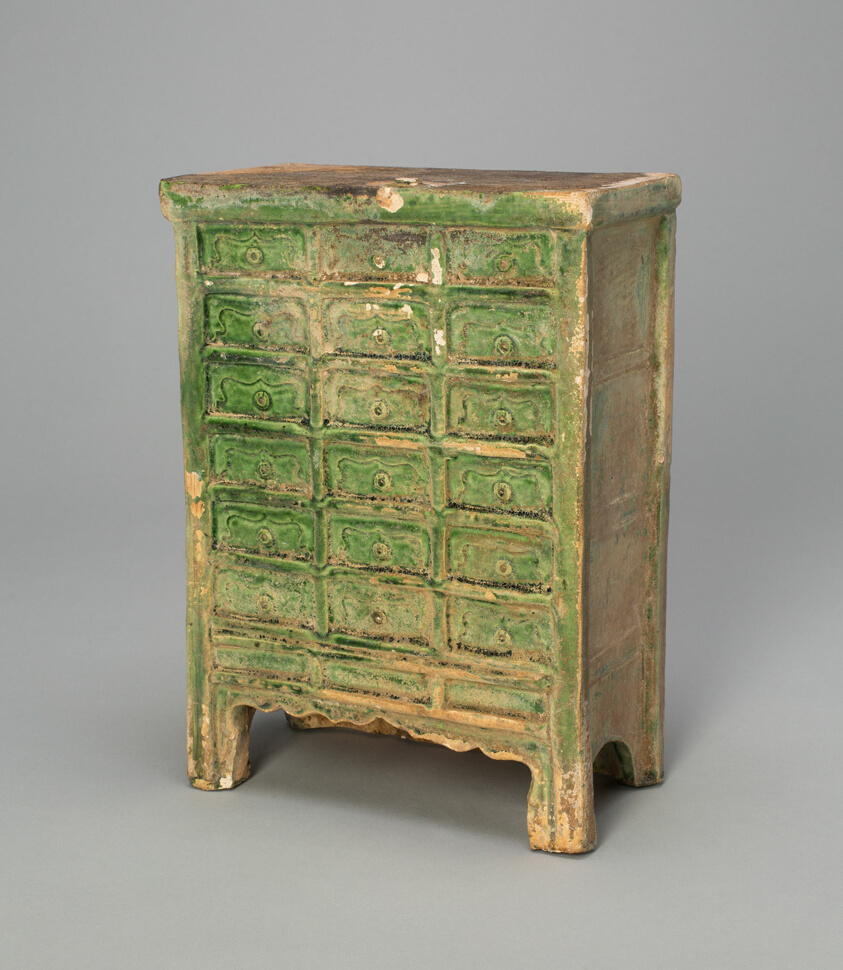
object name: Sculpture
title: Miniature Chest with Drawers (Mingqi)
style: Chinese (culture or style)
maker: China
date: Ming dynasty (1368–1644)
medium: Earthenware with green glaze and underglaze molded decoration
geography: China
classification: ceramics; asian art; sculpture